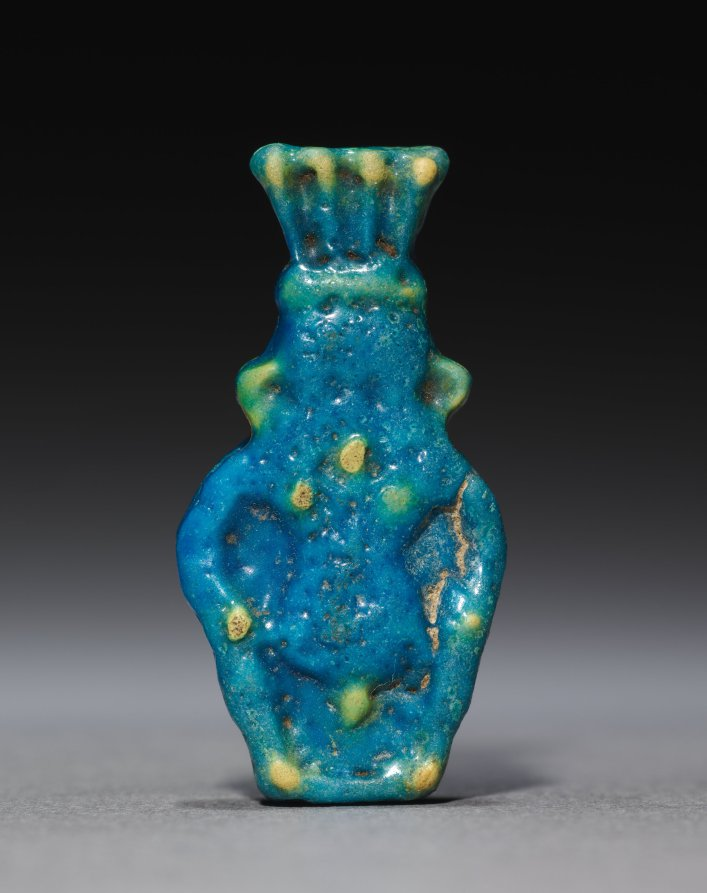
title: Amulet of Bes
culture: Egypt, Greco-Roman period (332 BCE–395 CE), Roman empire (30 BCE–395 CE)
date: 30 BCE–395 CE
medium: polychrome faience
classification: Amulets